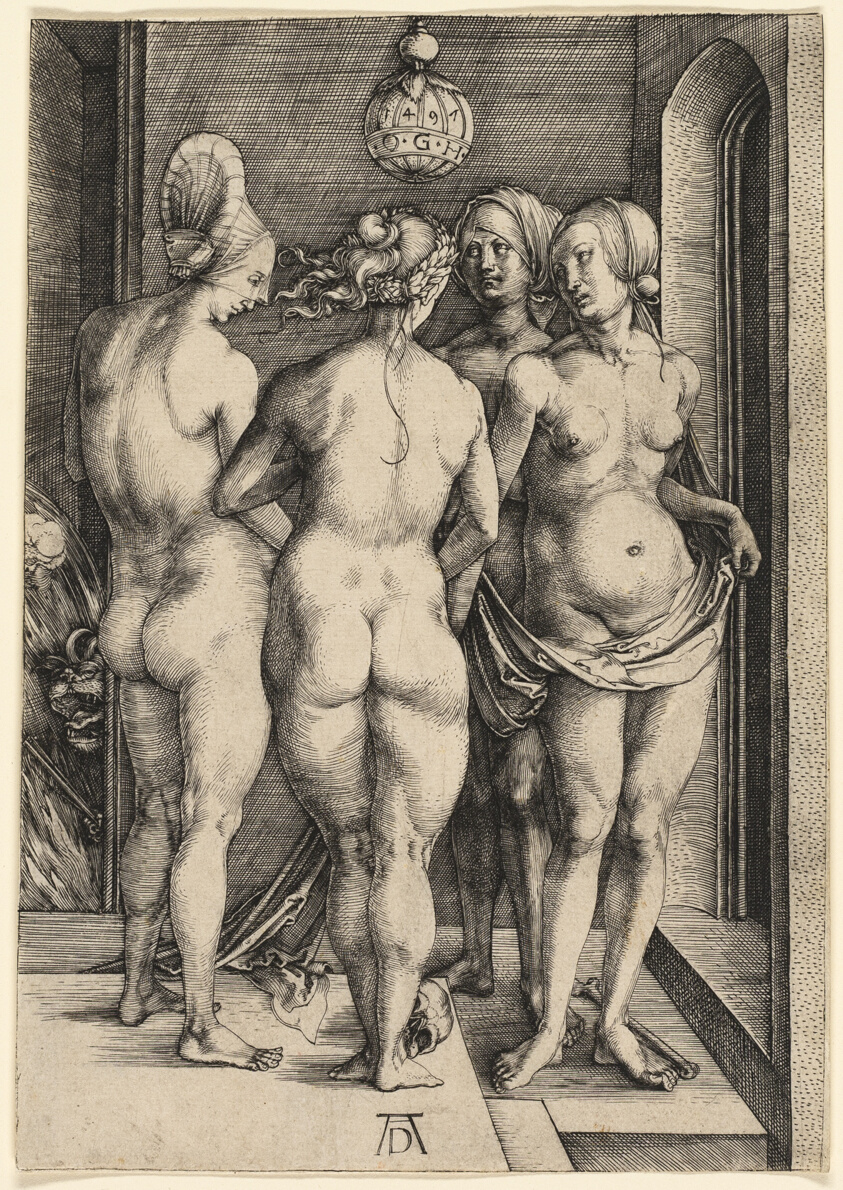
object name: Print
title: The Four Naked Women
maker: Albrecht Dürer (German, 1471-1528)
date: 1497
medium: Engraving in black on ivory laid paper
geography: Germany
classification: engraving; paper; print; prints and drawing